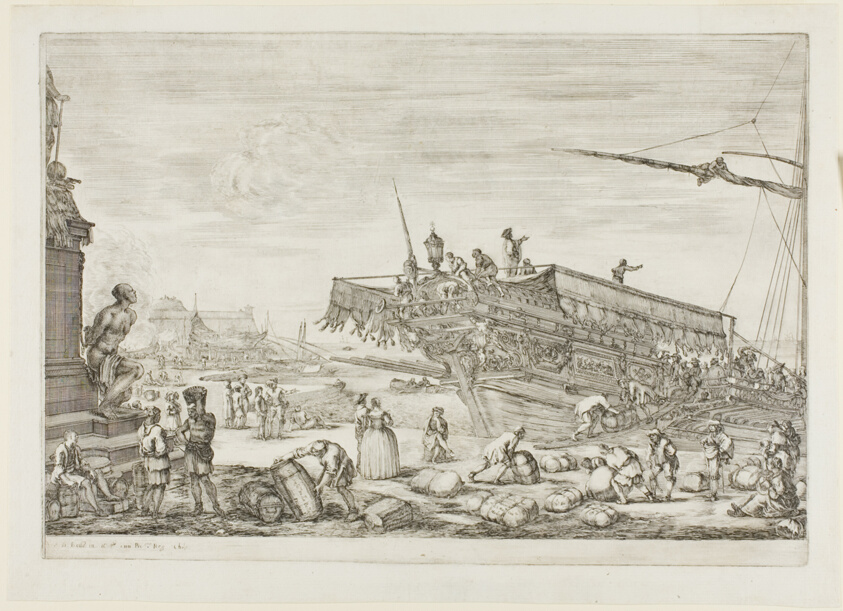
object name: Print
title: Changement d'une galère de l'ordre de Saint Étienne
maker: Stefano della Bella (Italian, 1610-1664)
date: 1654/55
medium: Etching on paper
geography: Italy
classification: etching; print; prints and drawing